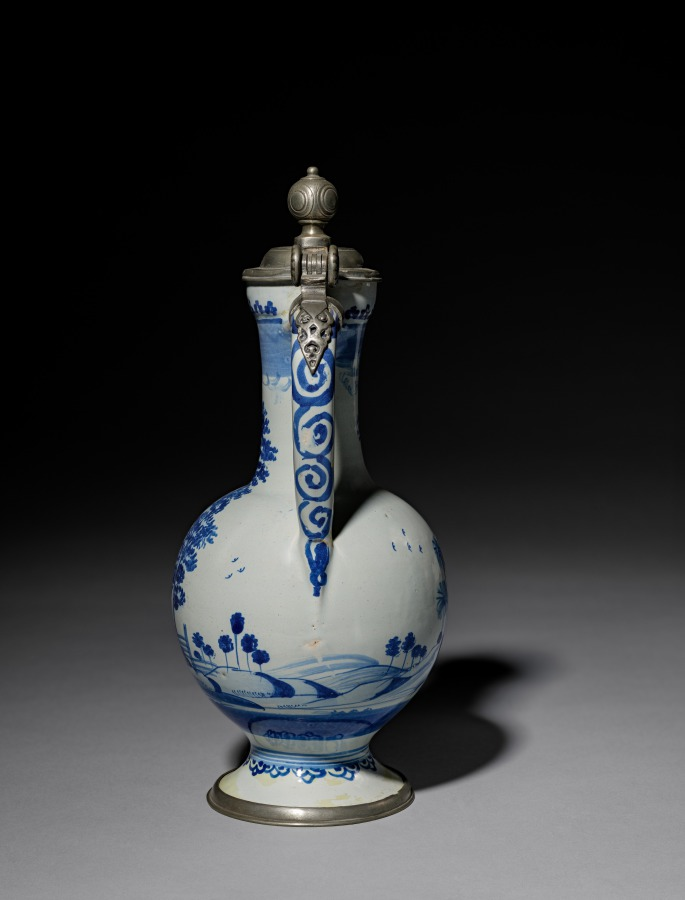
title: Covered Jug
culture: Germany, Bayreuth(?), 18th century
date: 1750–75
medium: earthenware decorated in underglaze blue with pewter mounts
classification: Ceramic